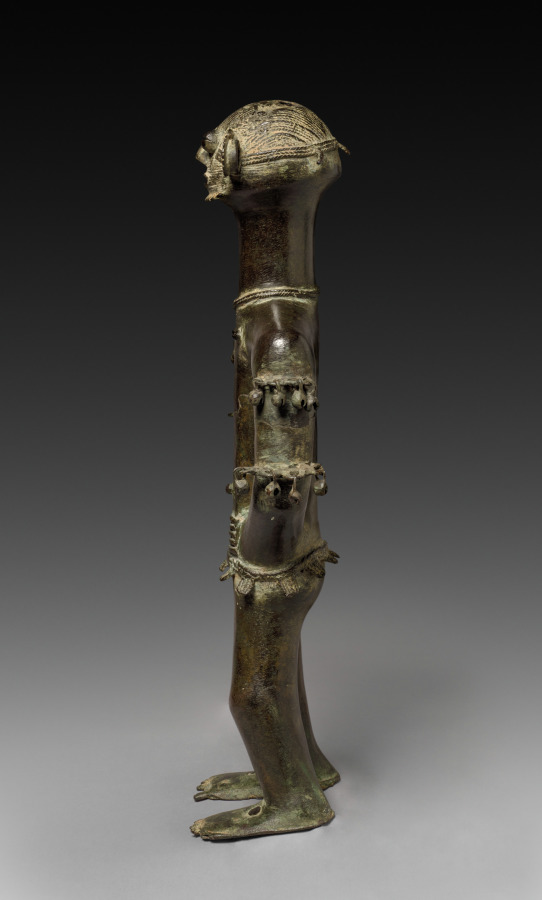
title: Male figure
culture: Africa, West Africa, Nigeria, Benue River Valley, Unidentified maker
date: probably 1800s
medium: Copper alloy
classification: Sculpture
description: Realized in a very distinctive style using the lost-wax method, this figure’s cultural origin and function is limited because it was removed from Nigeria during that country’s turbulent civil war of the late 1960s. Perhaps it was once part of an altar or shrine dedicated to a guardian or tutelary spirit. Connotations of prestige and wealth may explain why copper-alloy objects were diffused across vast territory and inherited over many generations.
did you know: Figurative copper-alloy objects like this sculpture point to intense trade and the circulation of people, goods, and technologies in the Benue River Valley, resulting in a highly cosmopolitan society.